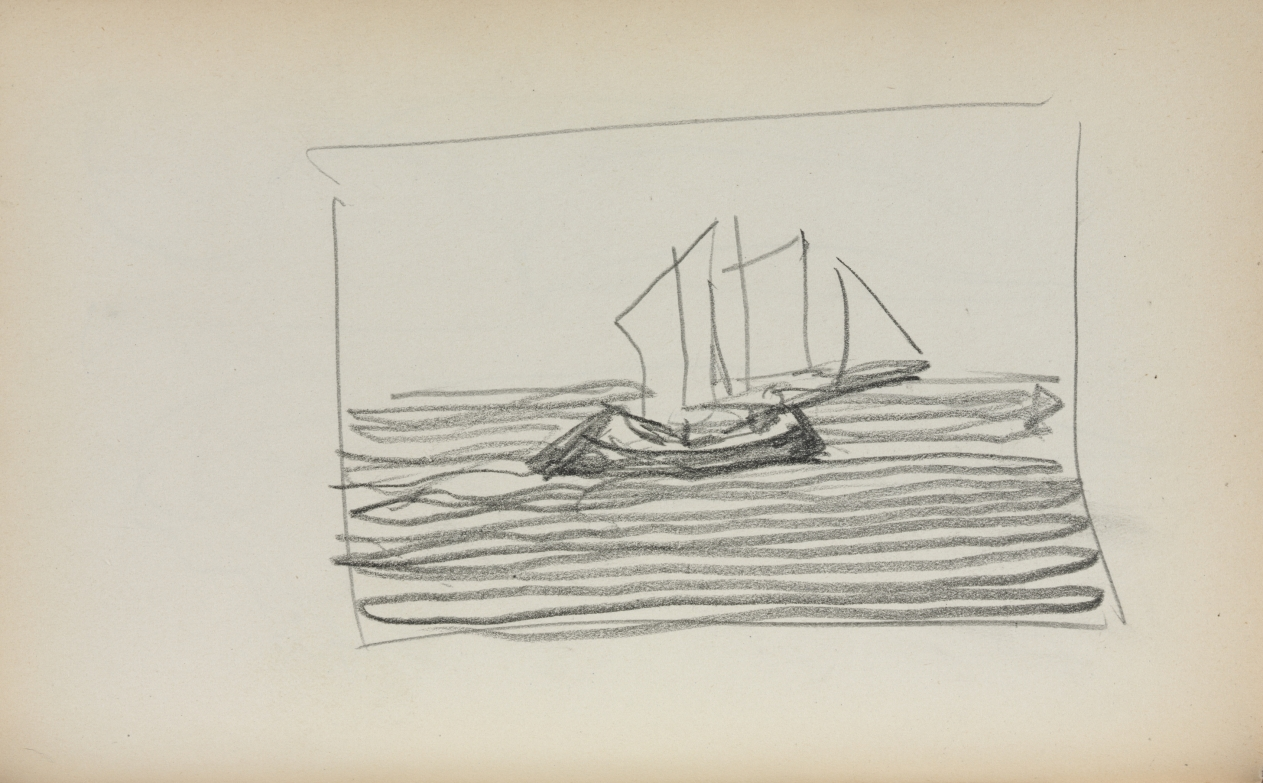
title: Italian Sketchbook: Sailboat (page 75)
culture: America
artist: Maurice Prendergast (American, born Newfoundland [now Canada], 1858–1924)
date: 1898–1899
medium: pencil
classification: Bound Volume